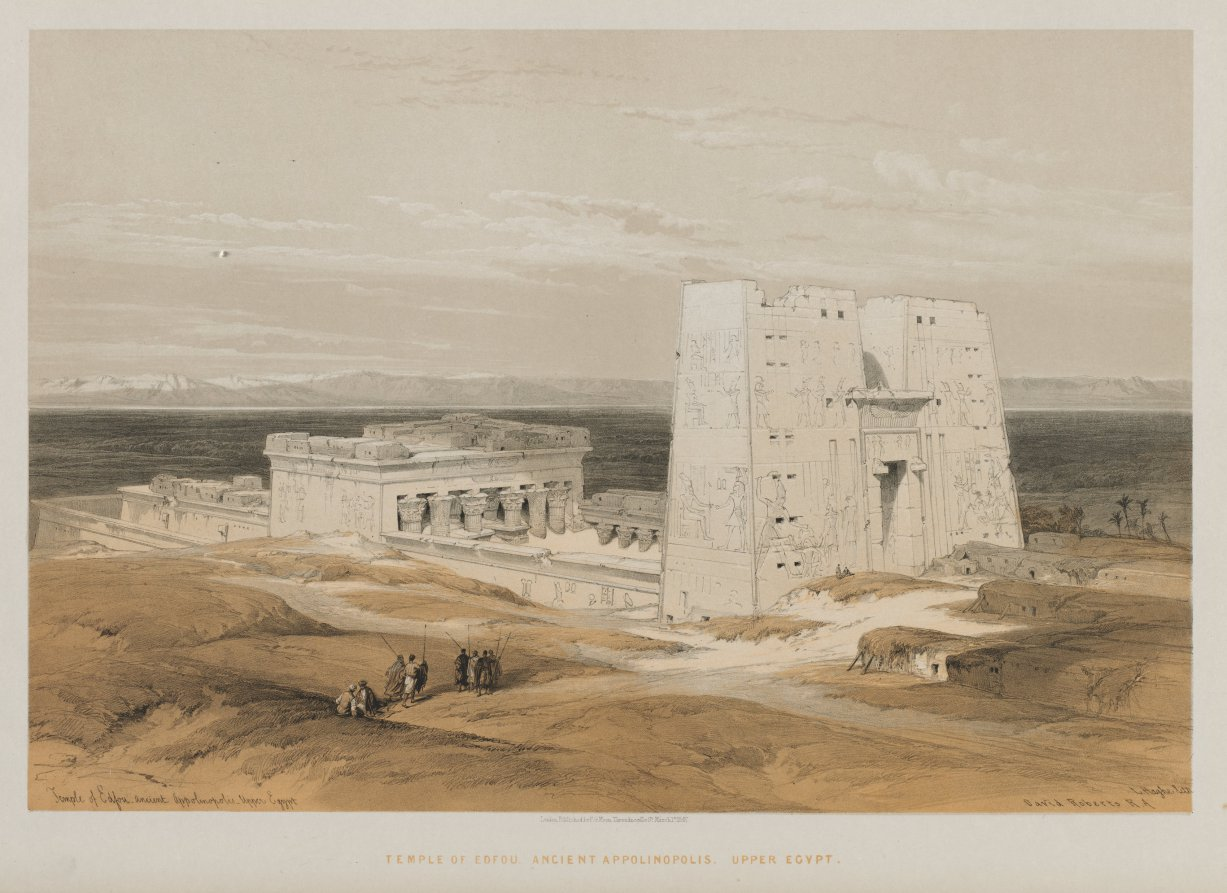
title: Egypt and Nubia, Volume I: Temple at Edfou, Ancient Apollinopolis, Upper Egypt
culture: England, 19th century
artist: Louis Haghe (British, 1806–1885)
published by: F. G. Moon (British, 1797–1871)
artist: after David Roberts (Scottish, 1796–1864)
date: 1847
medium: color lithograph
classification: Print